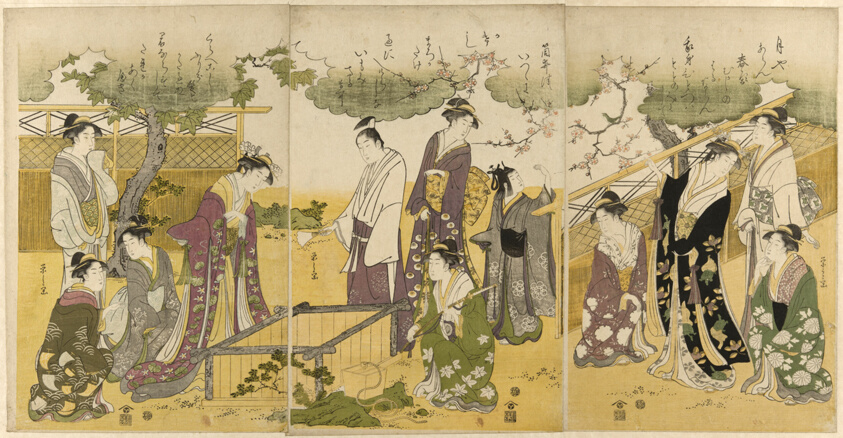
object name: Print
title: Parody of the Well Curb Story from the Tales of Ise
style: Japanese (culture or style)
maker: Chobunsai Eishi; Japanese, 1756-1829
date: c. 1789/1801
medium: Color woodblock print; oban triptych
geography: Japan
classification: woodblock print; print; asian art